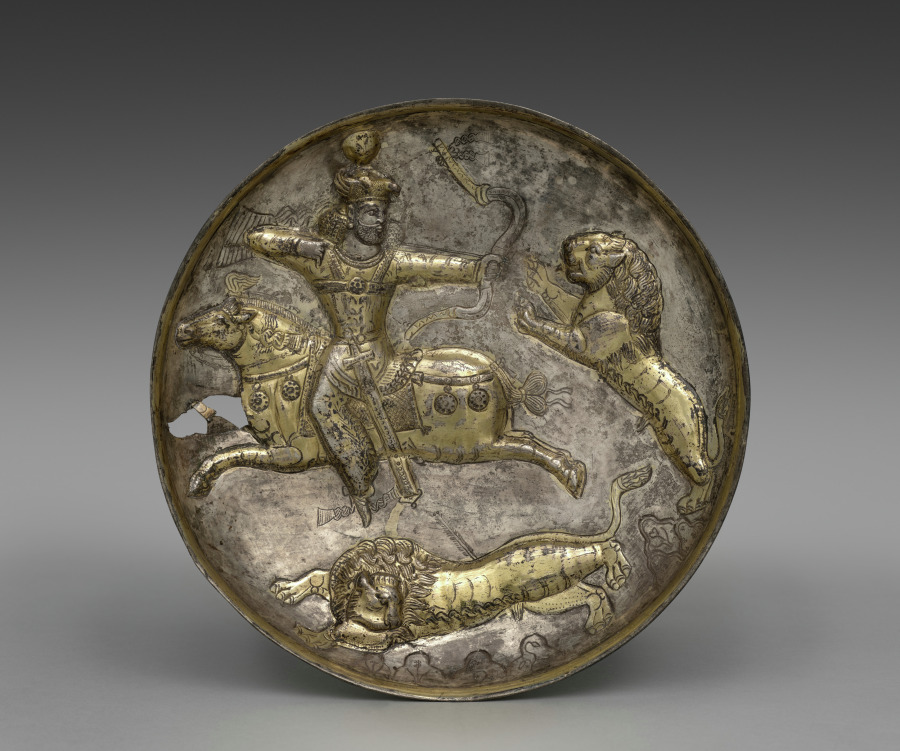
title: Dish with King Hormizd II or Hormizd III Hunting Lions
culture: Iran, Sasanian Empire (224–651 CE)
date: 400–600 CE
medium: silver gilt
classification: Metalwork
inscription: On reverse, inside foot, an inscription in Pahlavi reads according to Dr. Frye, Harvard University: "Gozac, one pound (fifty) one drachms."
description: Lion hunting was a traditional royal sport in ancient Near Eastern cultures and was frequently incorporated into artwork, such as Assyrian (about 912–612 BCE) palace reliefs. Thematically, depictions of the hunt in royal artwork bridge the pre- and post-Islamic worlds. This dish features the Sasanian ruler Hormizd II (reigned 303–309 CE), identifiable by his distinctive crown. The style of the king’s and horse’s equipment suggest that this dish was made long after he died, perhaps as a commemorative work by a much later successor, Hormizd III (reigned 457–459 CE).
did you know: Hormizd II's crown is distinct with its eagle form and topped with the traditional korymbos, a fine, bejeweled fabric that encases the top hair in a globelike fashion.